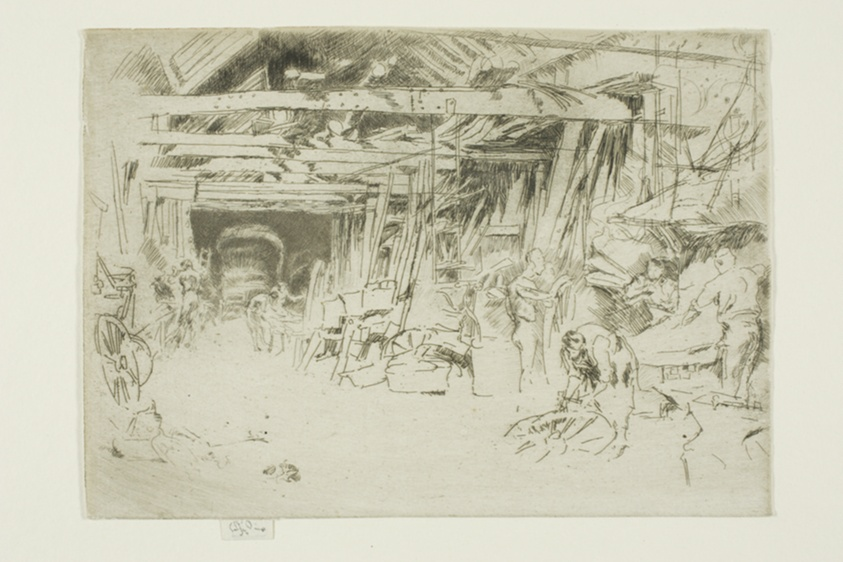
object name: Print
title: Wheelwright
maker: James McNeill Whistler (American, 1834-1903)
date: 1880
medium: Etching and drypoint with foul biting in black ink on ivory laid paper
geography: United States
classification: etching; foul biting; print; prints and drawing; drypoint; paper